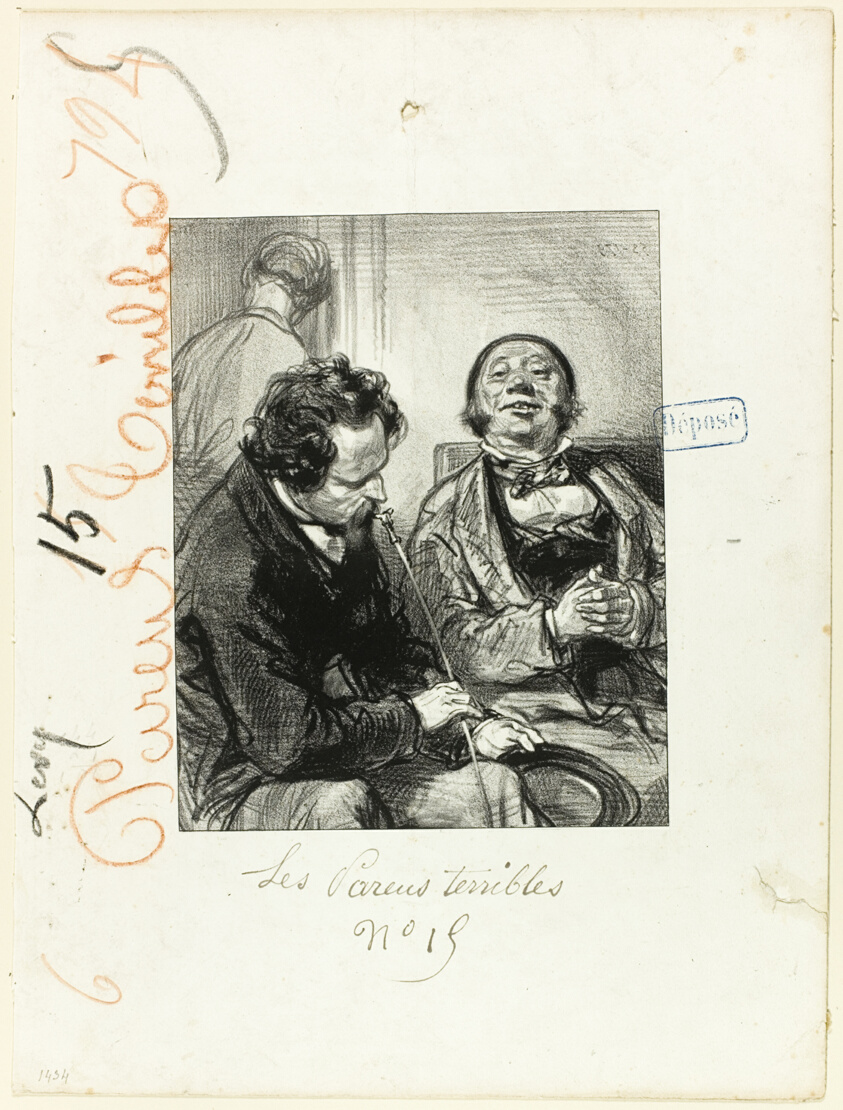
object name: Print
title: Les-Parents-Terribles series: And now Sir, see what my little girl did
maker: Paul Gavarni (French, 1804-1866)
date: 1853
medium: Lithograph in black on cream wove paper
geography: France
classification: lithograph; print; prints and drawing